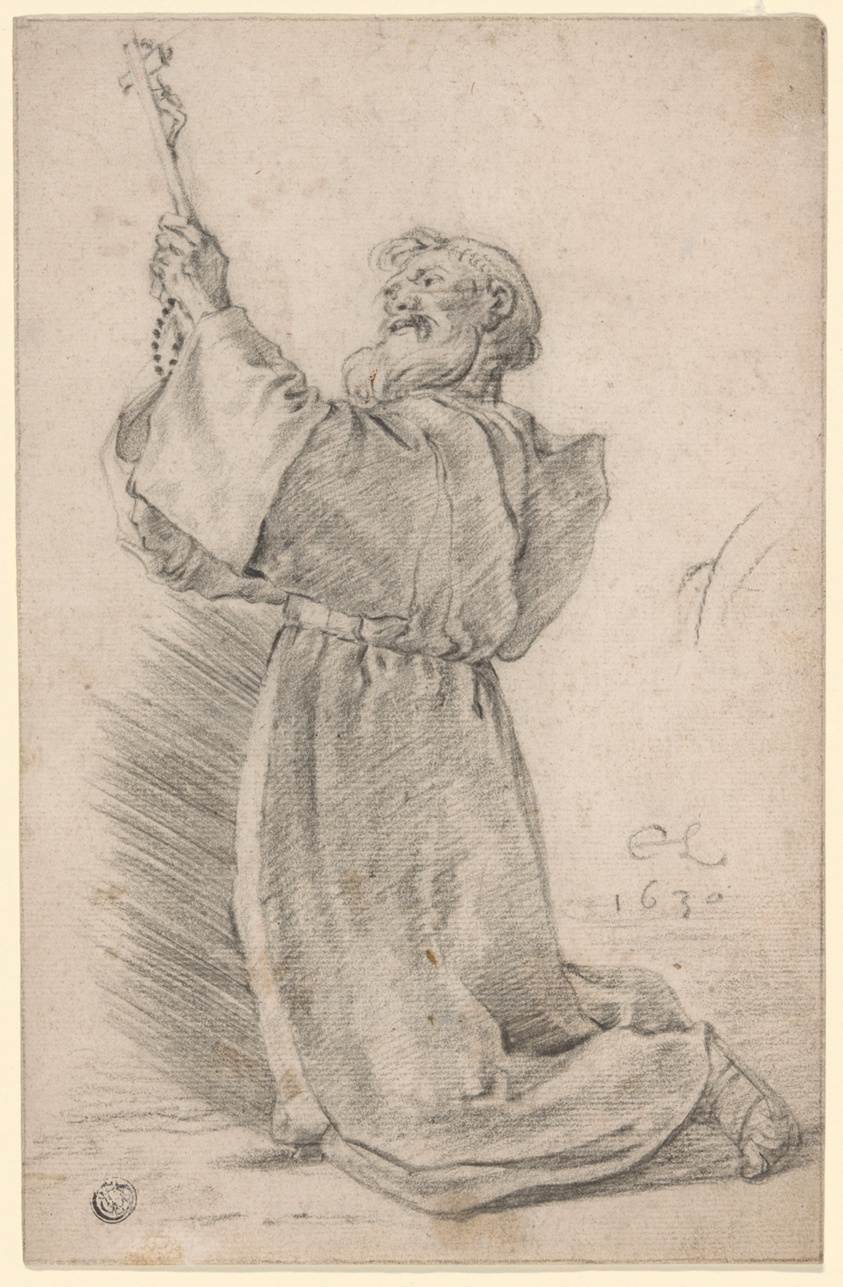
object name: Drawing and Watercolor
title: Kneeling Monk Holding a Crucifix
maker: Cornelis Saftleven (Dutch, 1607-1681)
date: 1630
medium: Black chalk on cream laid paper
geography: Holland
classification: chalk; drawings (visual works); prints and drawing